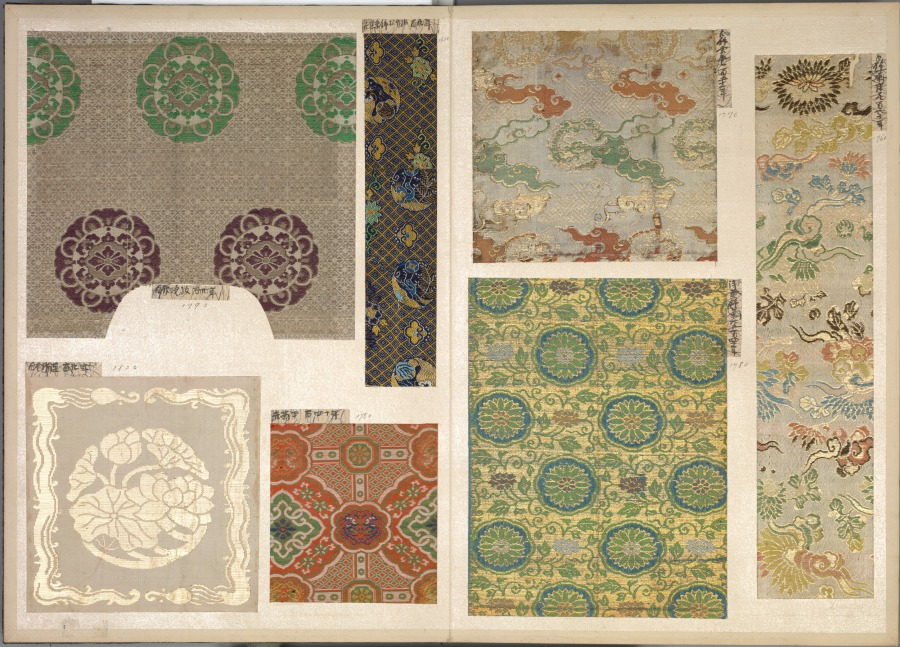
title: Album of Textile Samples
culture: Japan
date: 1790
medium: silk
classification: Textile